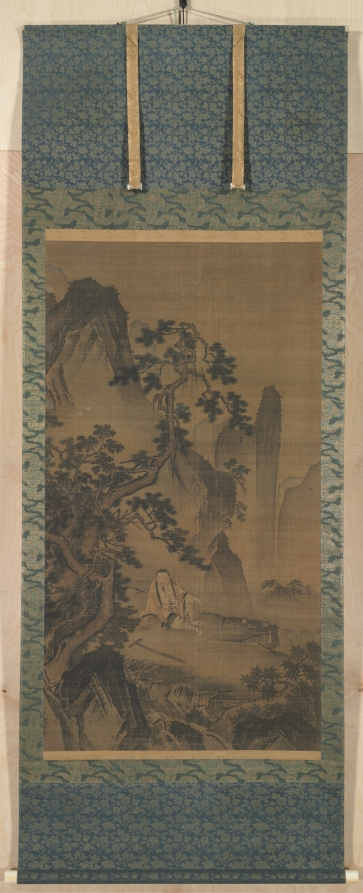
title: The Hermit Xu You Resting by a Stream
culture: China, Ming dynasty (1368–1644)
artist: Dai Jin (Chinese, 1388–1462)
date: 1400s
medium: Hanging scroll; ink and slight color on silk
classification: Painting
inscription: 5 seals: 1 of Huang Lin 黄琳 (active about 1496–1532); 4 unidentified.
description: Xu You, a recluse who refused the throne offered to him by legendary Emperor Yao, chose instead to farm on Mount Ji. Sitting under cliffs, his left arm resting on his risen leg and his loose robe revealing his belly, he displays a nonchalant attitude. Xu You is wearing a laborer’s outfit, a short robe and tight leggings, while his composed pose and gentle features reveal his lofty character. The composition shows rising mountains on the left juxtaposed by open space on the far right. Powerful brushstrokes and nuanced ink washes follow the style of the Southern Song (1127–1279) academy painters.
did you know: When the emperor offered him a post overseeing the Nine Territories (as China was known in ancient times), Xu You went to the River Ying to cleanse his ears from such an unwelcome proposition.